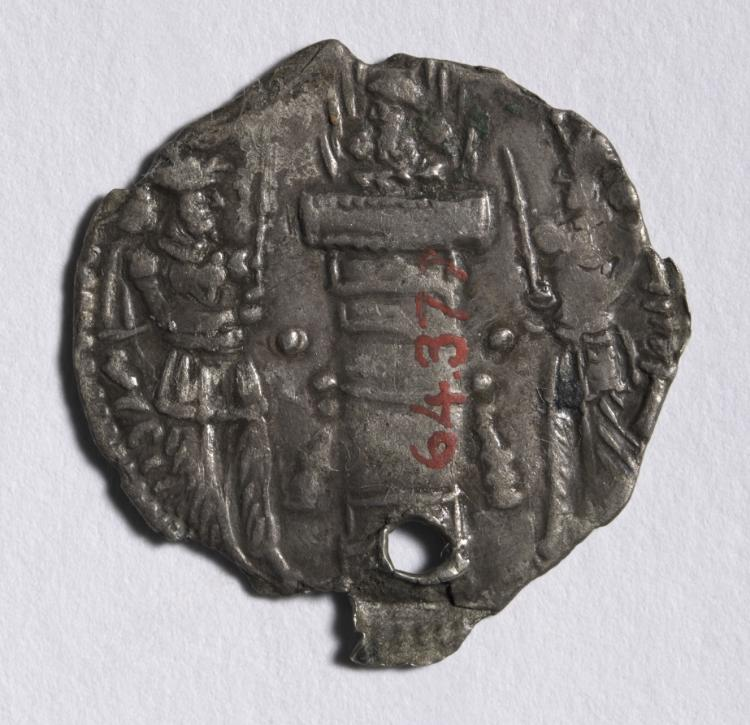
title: Drachm: Fire Altar with Bust, Zoroastrian Priest and King as Priest (reverse)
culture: Iran, (minted), Sasanian Empire (224–651 CE), reign of Hormizd II (303–309)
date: 302–9 CE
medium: silver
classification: Coins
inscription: 𐭠𐭲𐭥𐭫𐭦𐭩𐭠𐭥𐭧𐭬𐭦𐭣